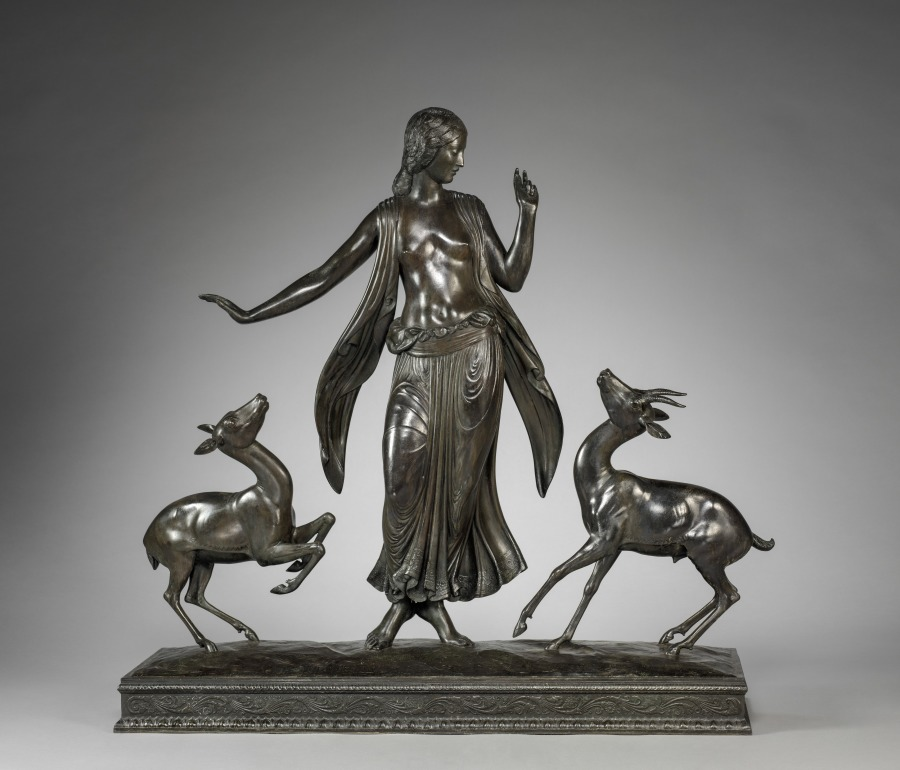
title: Dancer and Gazelles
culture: America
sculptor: Paul Manship (American, 1885–1966)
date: 1916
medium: bronze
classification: Sculpture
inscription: Signed on base: PAUL MANSHIP © 1916.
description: One of Manship’s most popular compositions, this work established his reputation as an important up-and-coming sculptor. Here, his mastery of elegant silhouette is manifest through the gracefully posed dancer and her sleek animal companions. Stylized decorative patterning embellishes the dancer’s hair and swaying skirt.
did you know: Initially interested in painting, Manship opted to pursue sculpture after discovering he had color vision deficiency.